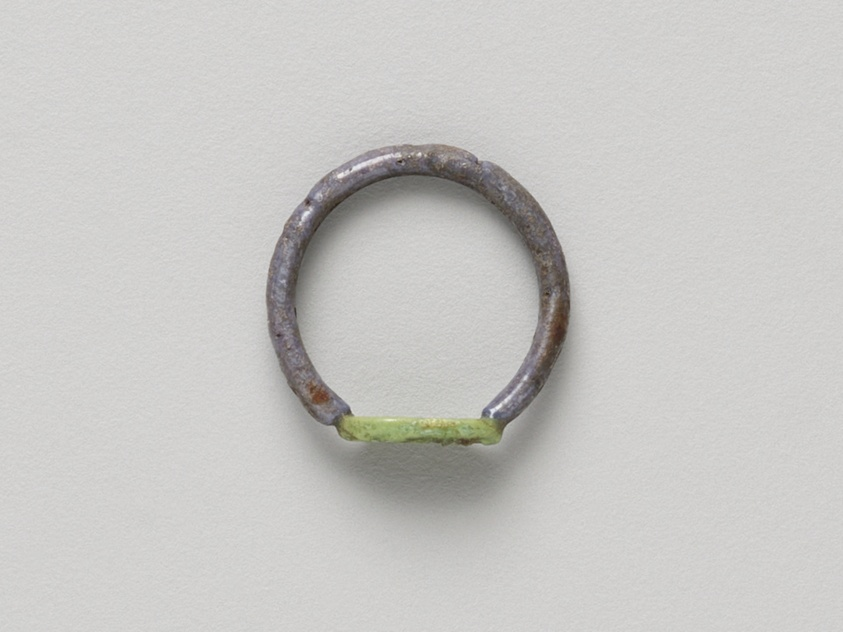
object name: Costume and Accessories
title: Finger Ring with the Throne Name of King Psusennes II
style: third intermediate period, twenty-first dynasty, egyptian, ancient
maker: Egyptian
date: Third Intermediate Period, Dynasty 21, reign of Psusennes II (about 959–945 BCE)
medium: Faience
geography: Egypt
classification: ring (jewelry); ceramics; jewelry; ancient art; costume; faïence (composite material)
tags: Hieroglyphs, pharaohs, kings